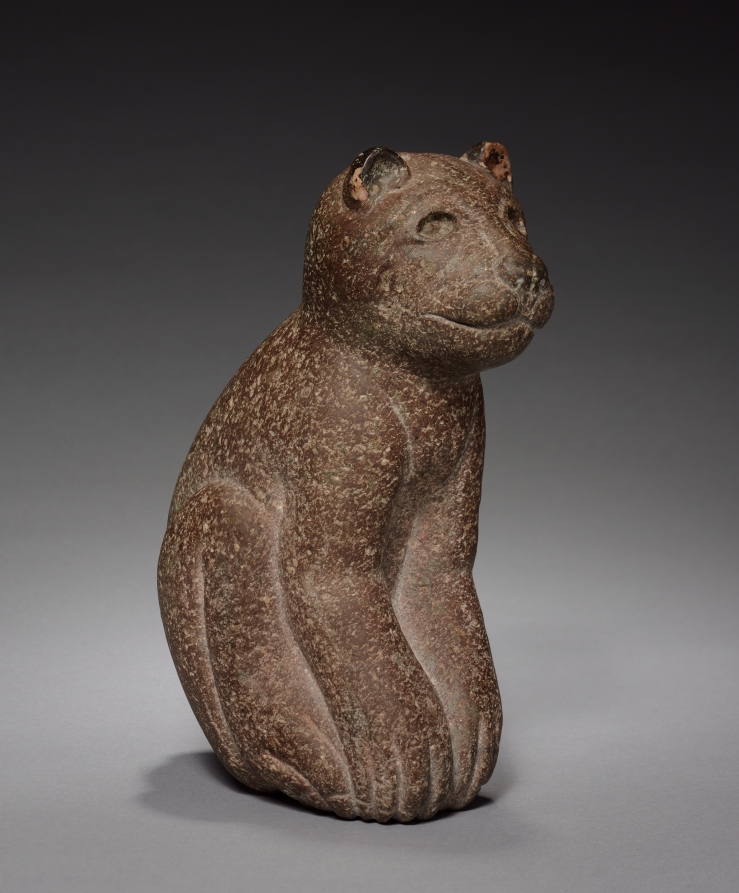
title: Feline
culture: Central Mexico, Aztec, 13th-16th century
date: c. 1200–1519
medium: stone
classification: Sculpture